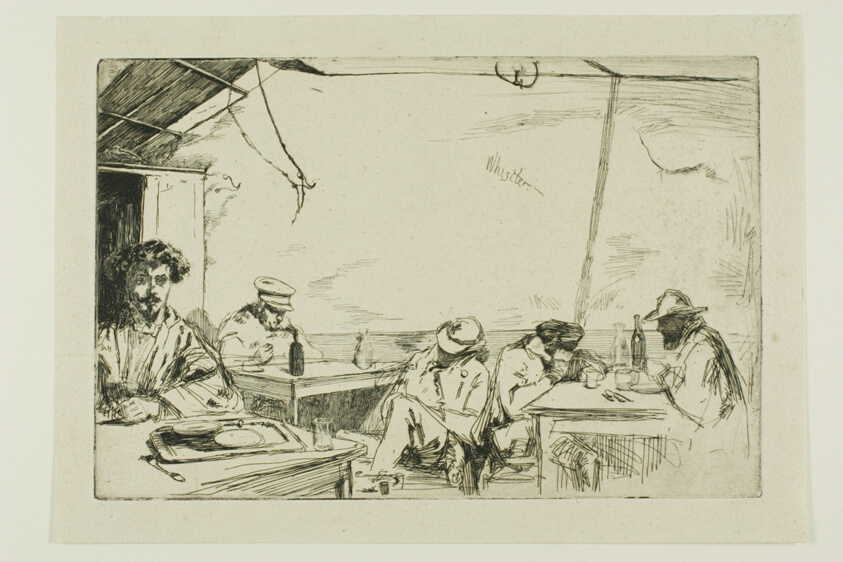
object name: Print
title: Soupe à trois sous (Soup for three sous)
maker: James McNeill Whistler (American, 1834-1903)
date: 1859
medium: Etching with foul biting in black ink on buff wove paper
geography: United States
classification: etching; foul biting; print; prints and drawing; paper